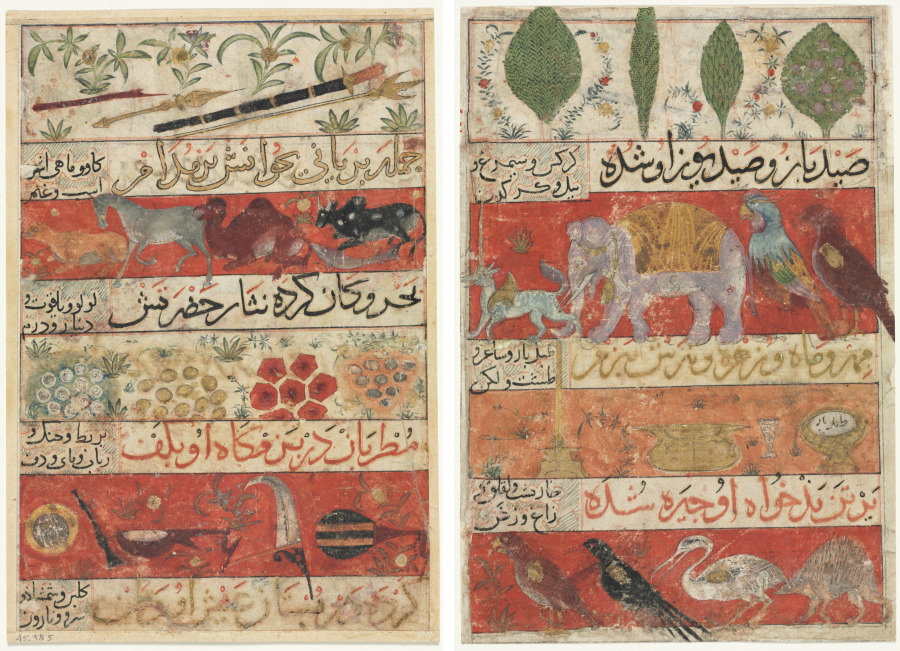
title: Animals, Precious Stones, Coins, and Musical Instruments (recto); Animals, Birds, and Plants (verso) from a Mu'nis al-Ahrar fi Daqa'iq al-Ash'ar (The Free Men's Companion to the Subtleties of Poems) of Muhammad Ibn Badr al-Din Jajarmi (active 1340s)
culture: Iran, Shiraz, Ilkhanid period (1256-1353)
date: c. 1341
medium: opaque watercolor, ink, and gold on paper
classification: Manuscript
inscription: Script: Thulth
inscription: (text on the previous page, leaf 2f, Harvard University Art Museums, 1960.186) In the hands of his slaves and of his friends are:/ Spear and sword, javelin and pen./ Ever all roasted at his table are:/ Ox and fish, camel and horse and sheep./ Ocean and mine have showered on his presence:/ Pearl and ruby, coined gold and silver/ The minstrels at his banquet bear in their hands:/ Lute and harp, rebec, pipe and tambourine./ Making the garden of his pleasure their homeland are:/ Rosebush and box-tree, cypress and elm./ Prey to hawk and prey to his cheetah are:/ Vulture and sīmurgh, elephant and rhinoceros./ Sun and Moon, Venus and Mercury are at his feast:/ Falcon-drum and goblet, bowl and candlestick./ Overwhelming the corpses of his foes are:/ Porcupine and stork, raven and kite.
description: This is one of several pages that were removed from a unique manuscript of this otherwise unknown work, which bears a colophon stating that it was written by the author and finished "Ramadan, 741" (February 1341). Illustrations on both sides include various animals, trees, and objects such as weapons, musical instruments, and jewels.